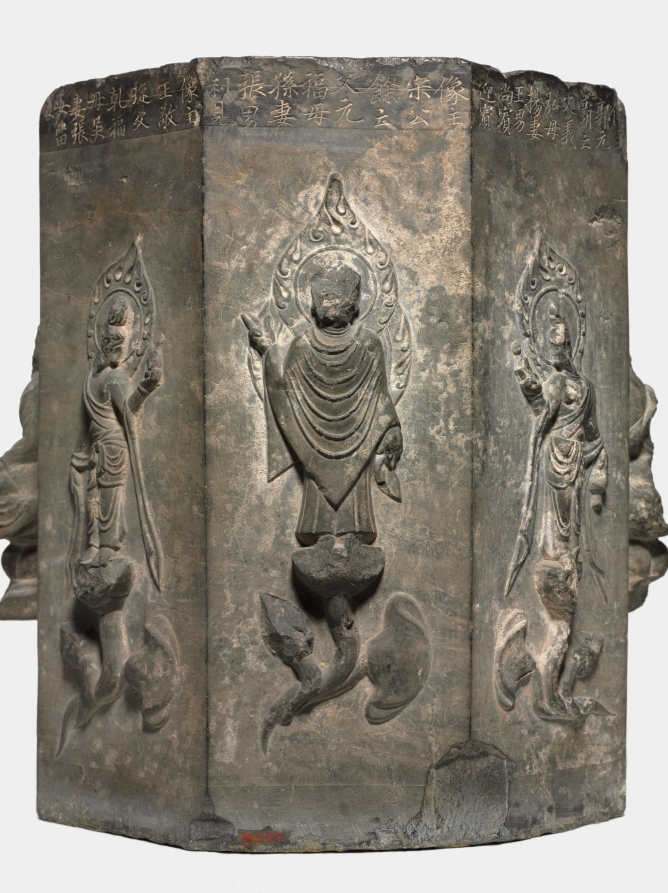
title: Section of a Dharani Pillar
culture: China, Tang dynasty (618-907)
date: 618–907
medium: limestone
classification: Sculpture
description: This octagonal stone pillar, with Buddhist figures carved on its eight sides, is part of a dharani pillar commissioned by Buddhist believers to pay tribute to the dead. The eight inscriptions seen here are eulogies dedicated by eight families to their deceased family members. Dharanis were a form of spell in Esoteric Buddhism said to possess supernatural power when being recited or carried and were incorporated into sutras, such as the Buddha Usnisa Vijaya Dharani Sutra. Dharani pillars, also called sutra pillars, became the dominant bearers of Usnisa Vijaya Dharani which supposedly helped sentient beings prolong life and destroy hardships of the eternal cycle of life and the realms of hell.